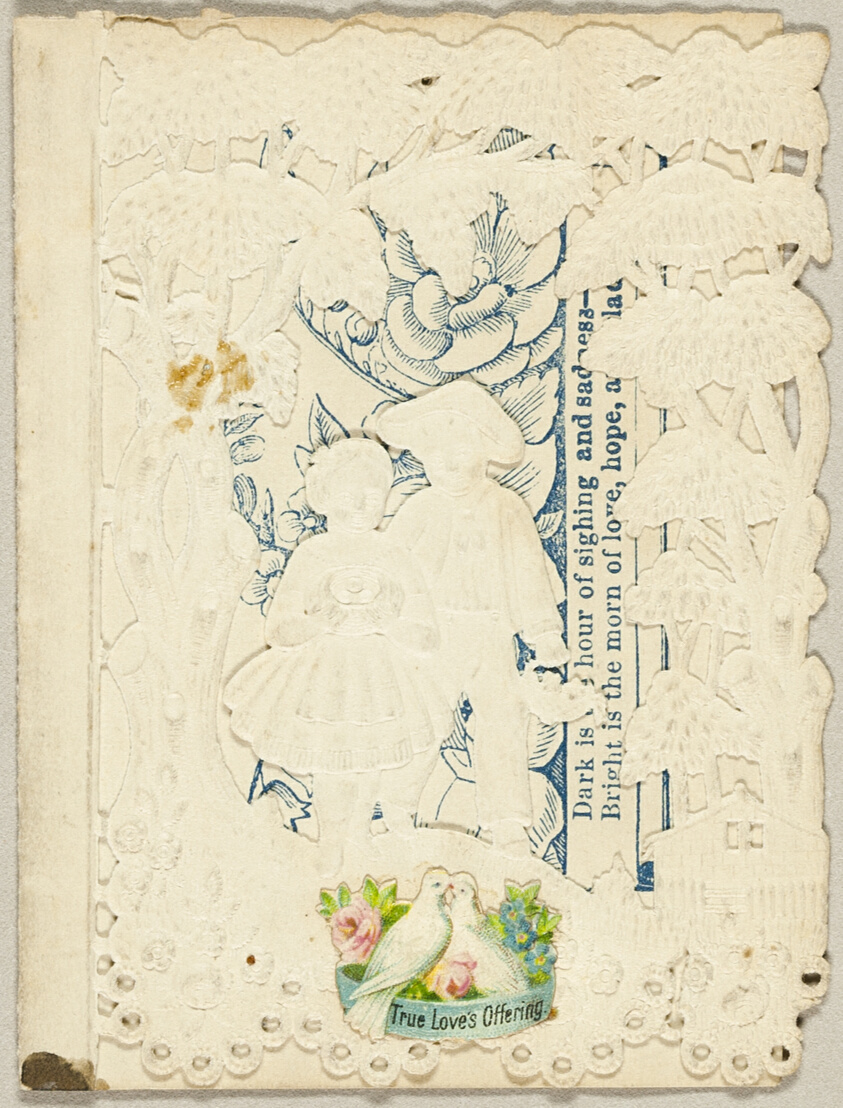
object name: Drawing and Watercolor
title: True Loves Offering (Valentine)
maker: Unknown Artist; American or English, 19th century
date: 1850/59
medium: Collaged elements on cut and embossed (designed) ivory wove paper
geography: United States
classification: collage; valentine; prints and drawing; paper